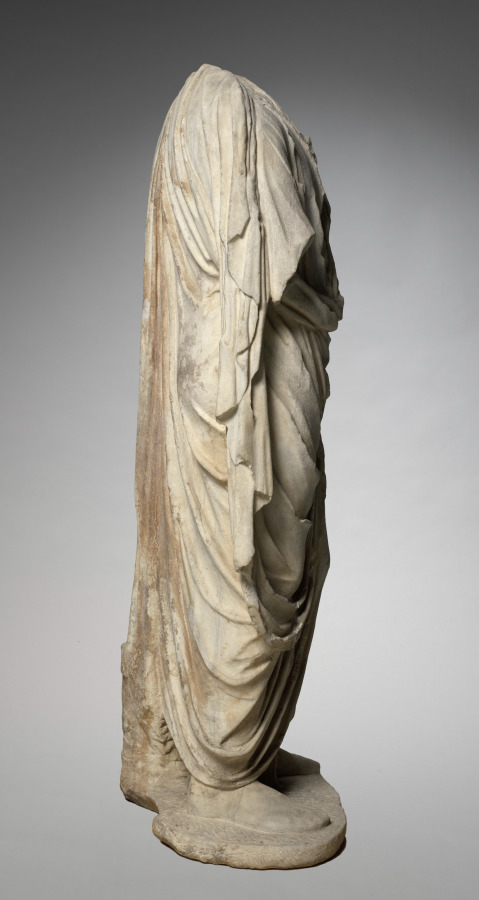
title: Togatus Figure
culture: Italy, Roman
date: 1–200 CE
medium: pentelic marble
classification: Sculpture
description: From 1929 until 1973, this toga-clad body was displayed with a portrait head of Vespasian (recarved from Nero) that did not originally belong to it. Several details indicate a mismatch: the surfaces and proportions differ, and the head projected awkwardly forward even after modern recarving of the neck to fit into the body cavity. Aspects of the toga also suggest that it was sculpted later than the head.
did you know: This body once included a separately made head and arms.